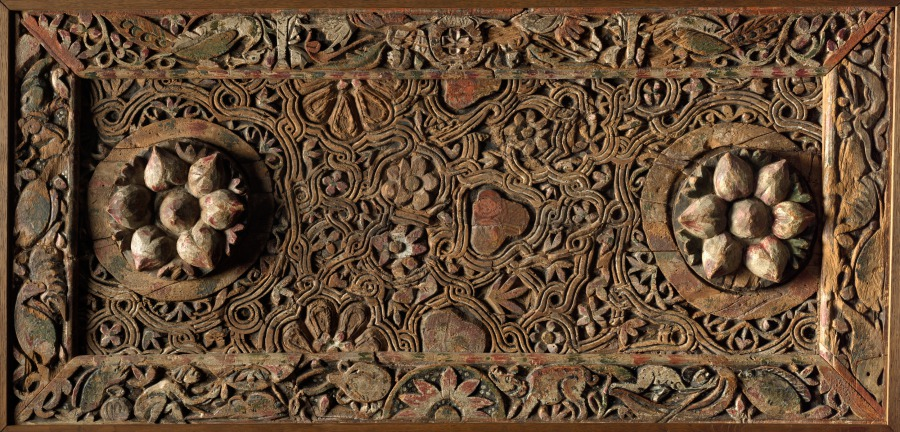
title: Ornamental Panel (from a Ceiling?)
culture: Egypt, Coptic period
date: 500s (frame) and 700s (central panel)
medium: wood with paint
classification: Furniture and woodwork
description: This wooden panel and its frame come from different locations. The four narrow panels forming the outer frame are stylistically datable to the 500s. The large central rectangular panel might date to the 700s. It is most likely a carved ceiling, but its architectural context is unknown. Both panel and frame have been cut down and joined together at some point in their history under unknown circumstances. The decorative program of the main panel features two large rosettes surrounded by florets, leaves, and fruit. The outer frame features two flying angels holding a wreath, a peacock, an octopus, a seated fisherman who holds a long line with a fish attached, and a swimming boy with a dolphin. The vocabulary of the frame is dominated by water life, particularly of the Nile and its banks. Though separated from its original place and altered, this important object provides a welcome glimpse of an architectural interior from early Christian Egypt.